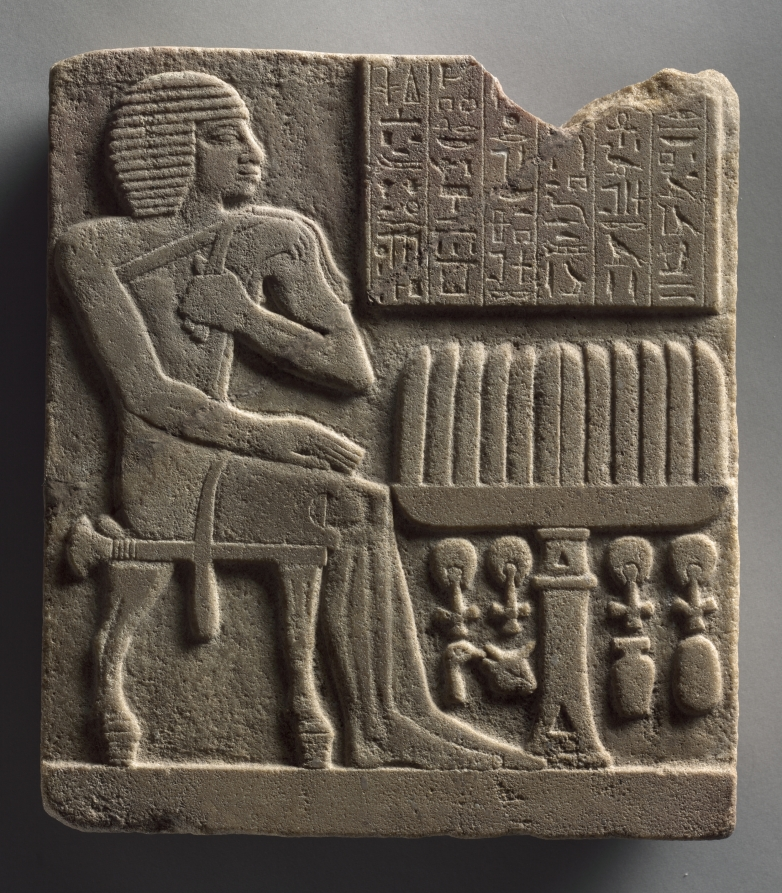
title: Stele of Djedatumiufankh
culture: Egypt, Late period (715–332 BCE), Dynasty 26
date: 664–525 BCE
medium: brown quartzite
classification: Sculpture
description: Were it not for the inscription in sunk relief and the man's name of a type that does not occur until the Third Intermediate Period, this stele could be easily mistaken for a work of the Old Kingdom, and for a long time it was. In fact, it was made 2,000 years later, in Dynasty 26, when artists turned to the past for inspiration.